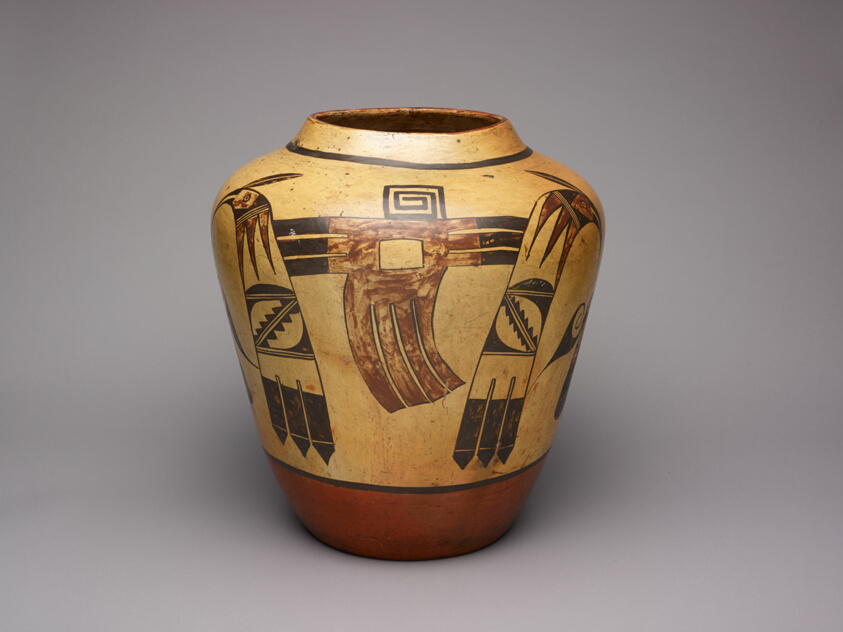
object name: Vessel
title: Polychrome Jar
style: hopi, pueblo, native american, americas, southwest, native north american, Arts of the Americas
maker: Hopi; Hopi, First Mesa, Arizona, United States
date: c. 1920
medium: Ceramic and pigment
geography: Arizona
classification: earthenware; art of the americas; ceramics; vessel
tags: abstract figures, animals, birds, servingware